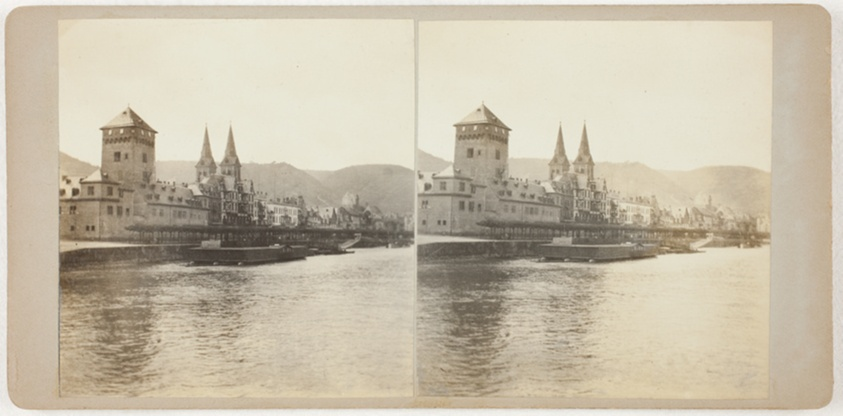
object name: Photograph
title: Untitled (Boppard)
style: 19th century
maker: Artist unknown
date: 1860s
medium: Albumen print, stereo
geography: Rhineland Palatinate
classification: photograph; albumen silver print; photography